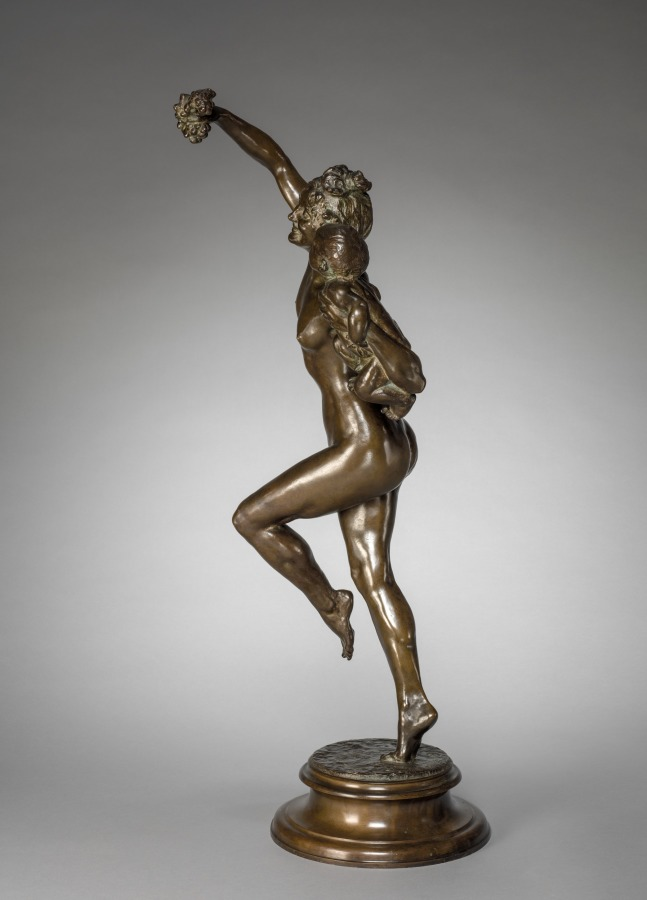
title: Bacchante and Infant Faun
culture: America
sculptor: Frederick William MacMonnies (American, 1863–1937)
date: 1894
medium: bronze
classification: Sculpture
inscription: Signed on base: F. Macmonnies, 1894.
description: This sculpture is a smaller version of a three-quarter life-size bronze given by the artist to Charles McKim, the architect for the Boston Public Library who placed the statue in the fountain of the library's courtyard. Although the vast majority of Bostonians supported the statue, a small but powerful group denounced it as "debauched," "vice-ridden," and "treason to purity and sobriety and virtue, and Almighty God." The opponents included the Boston Brahmins—a group of Anglo-Saxon, Protestant elite—and various religious, temperance, and antivice organizations. Feeling threatened by the swell of immigrants and by the changing roles of women, these groups hoped that the library would offer an alternative to the saloons frequented by Boston's lower classes. But a statue of a nude woman reveling under the effects of wine from the Roman god Bacchus only devalued this bastion of civilization. Consequently, the Boston Art Commission rejected the statue in 1897. However, in 1992 Boston's Art and Humanities commissioner and the library trustees returned a version of the original to the courtyard without public protest.